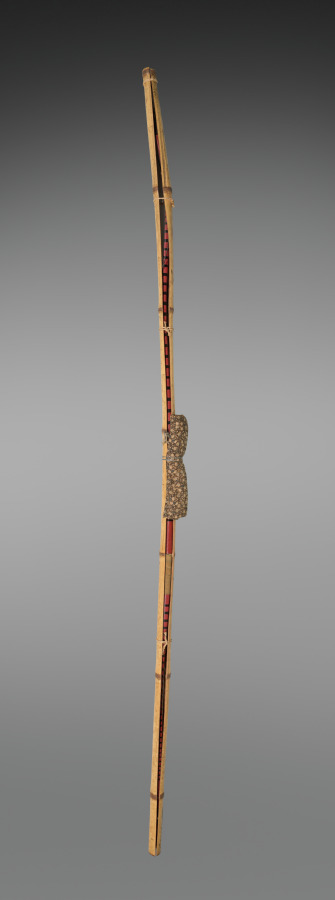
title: Bow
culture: Japan, Edo period (1615–1868)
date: early to mid-1800s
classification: Arms and Armor